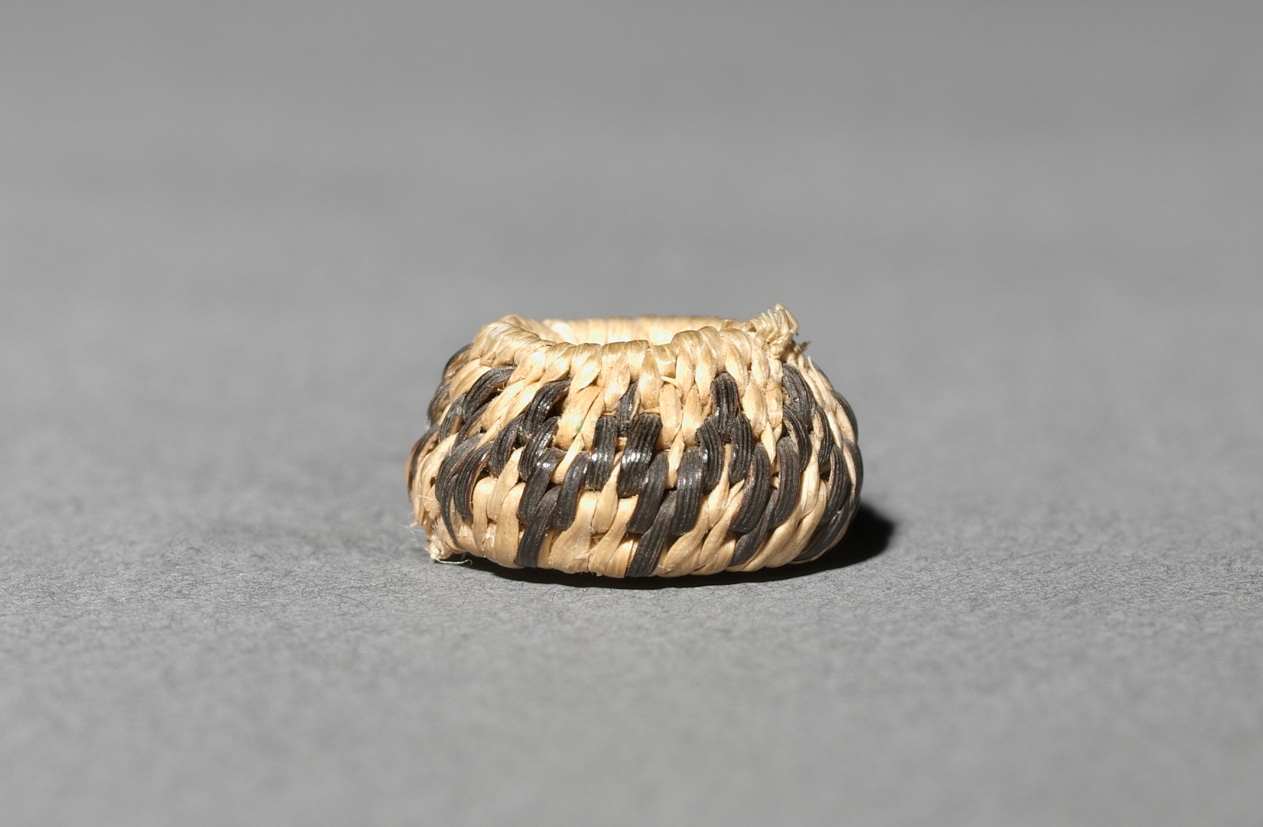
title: Miniature Round Basket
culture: California, Pomo, late 19th-early 20th century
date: late 1800s-early 1900s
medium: plant materials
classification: Basketry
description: Miniature baskets were made to demonstrate the basket-maker’s virtuoso skill, and these tiny marvels seem to be no exception—the smallest are only five millimeters wide but still patterned. For such fine work, dexterity was required as much for preparation of materials as for weaving.